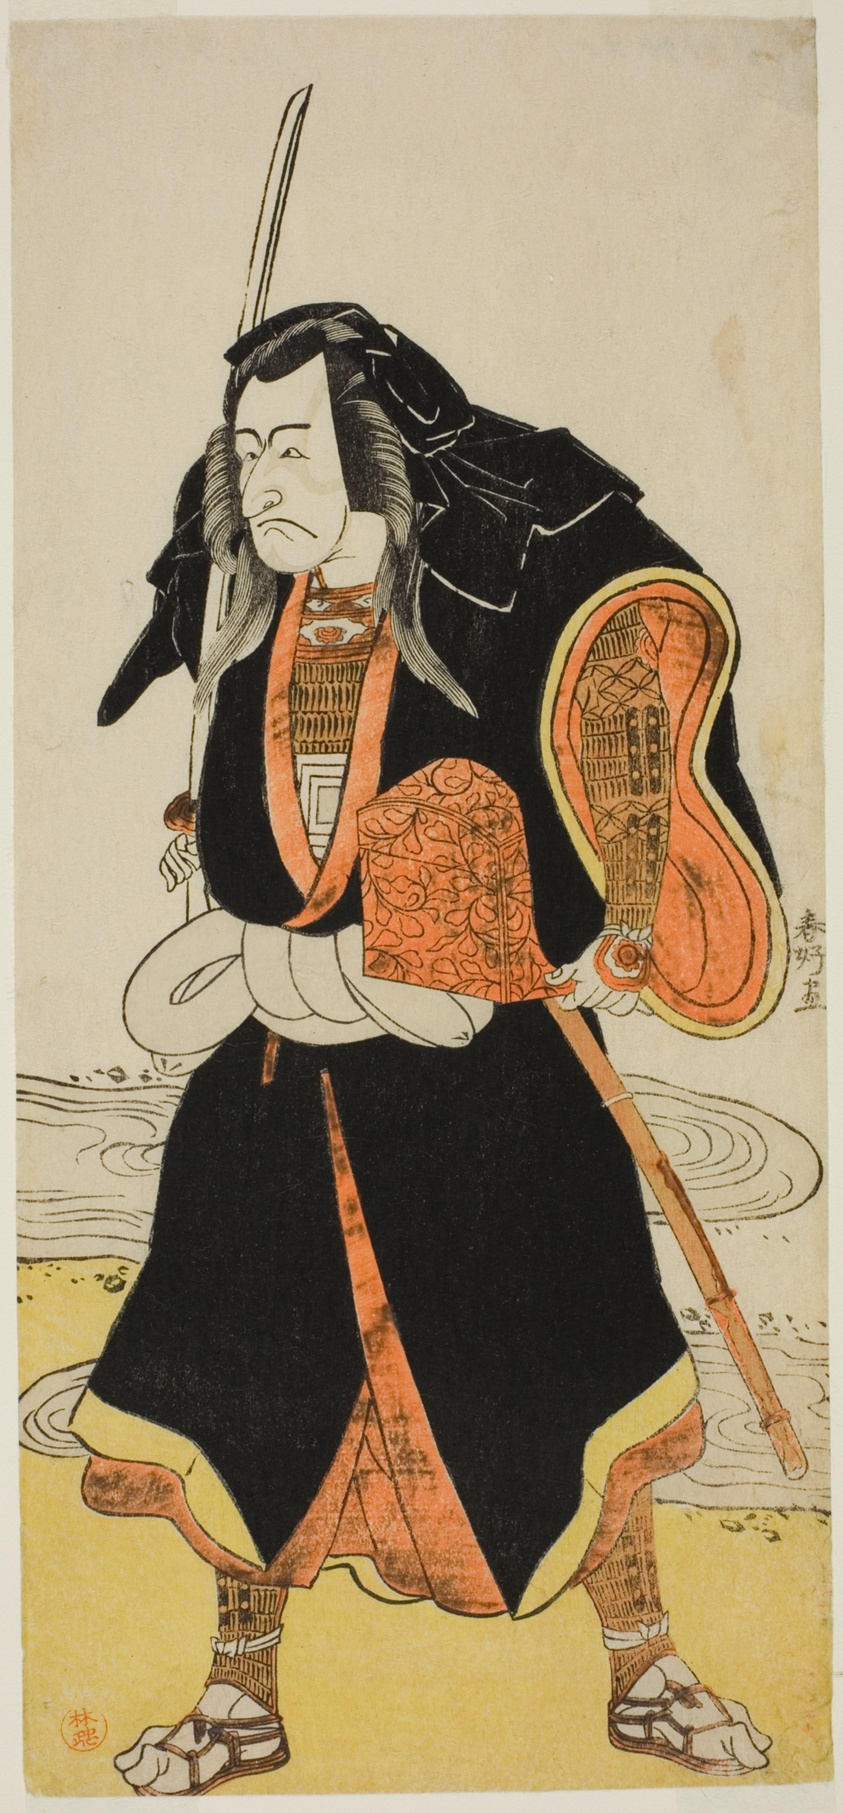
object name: Print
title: The Actor Ichikawa Danjuro V, Probably as Ise no Saburo Disguised as Sanjo Uemon, Leader of a Robber Gang, in Part Two of the Play Fude-hajime Kanjincho (First Calligraphy of the New Year: Kanjincho [The Subscription List]), Performed at the Nakamura Theater from the Fifteenth Day of the First Month, 1784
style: Japanese (culture or style)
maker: Katsukawa Shunko I; Japanese, 1743-1812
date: c. 1784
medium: Color woodblock print; hosoban; right sheet of triptych (?)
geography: Japan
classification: woodblock print; print; asian art